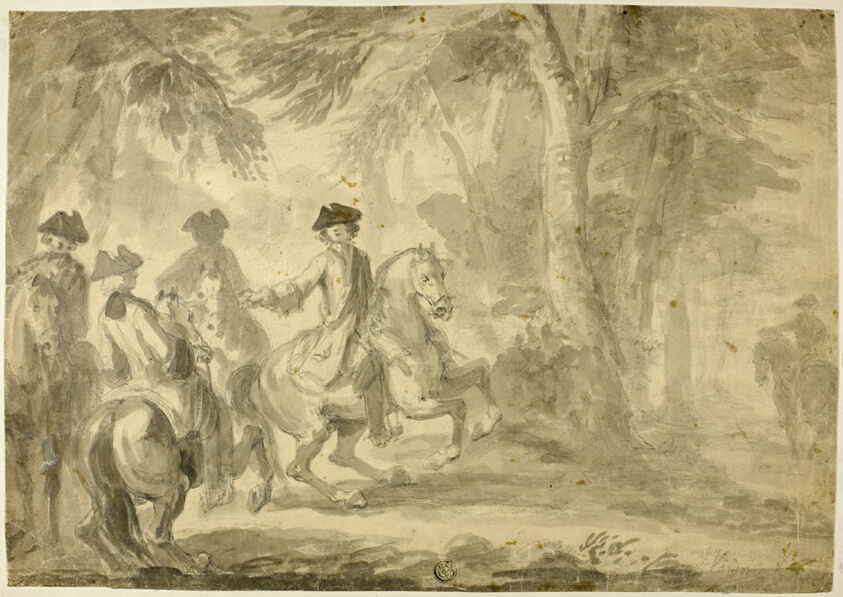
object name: Drawing and Watercolor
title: Riders in Park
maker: John Vanderbank (English, active 1689-1727)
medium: Graphite with brush and gray wash, on tan laid paper, tipped onto card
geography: England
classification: ink or chalk wash; drawings (visual works); prints and drawing